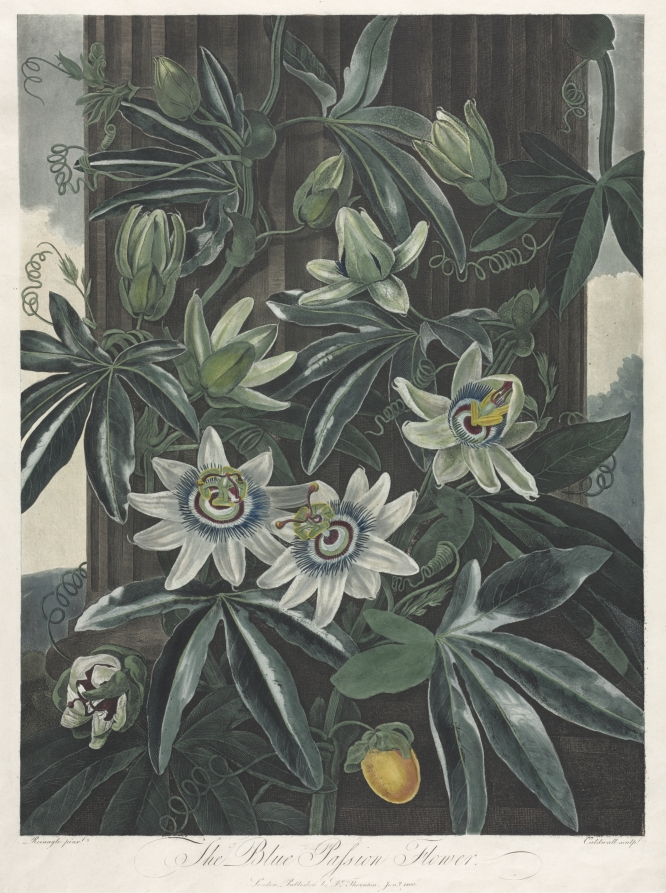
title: The Temple of Flora, or Garden of Nature: The Blue Passion Flower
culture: England, late 18th-early 19th Century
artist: Robert John Thornton (British, 1768–1837)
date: 1800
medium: aquatint, stipple and line engraving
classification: Print